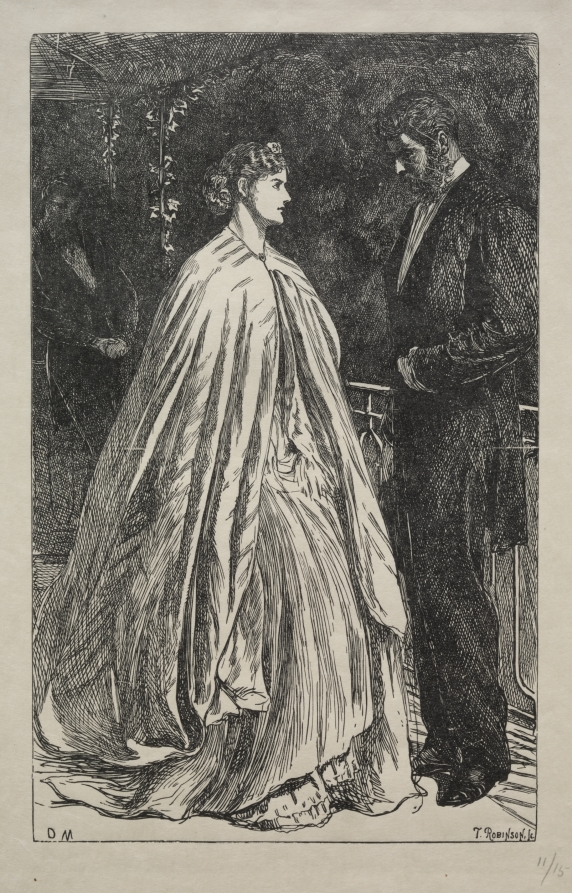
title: Two to One on the Major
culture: England, 19th century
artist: George Louis Palmella Busson Du Maurier (British, 1834–1896)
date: 1866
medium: wood engraving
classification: Print